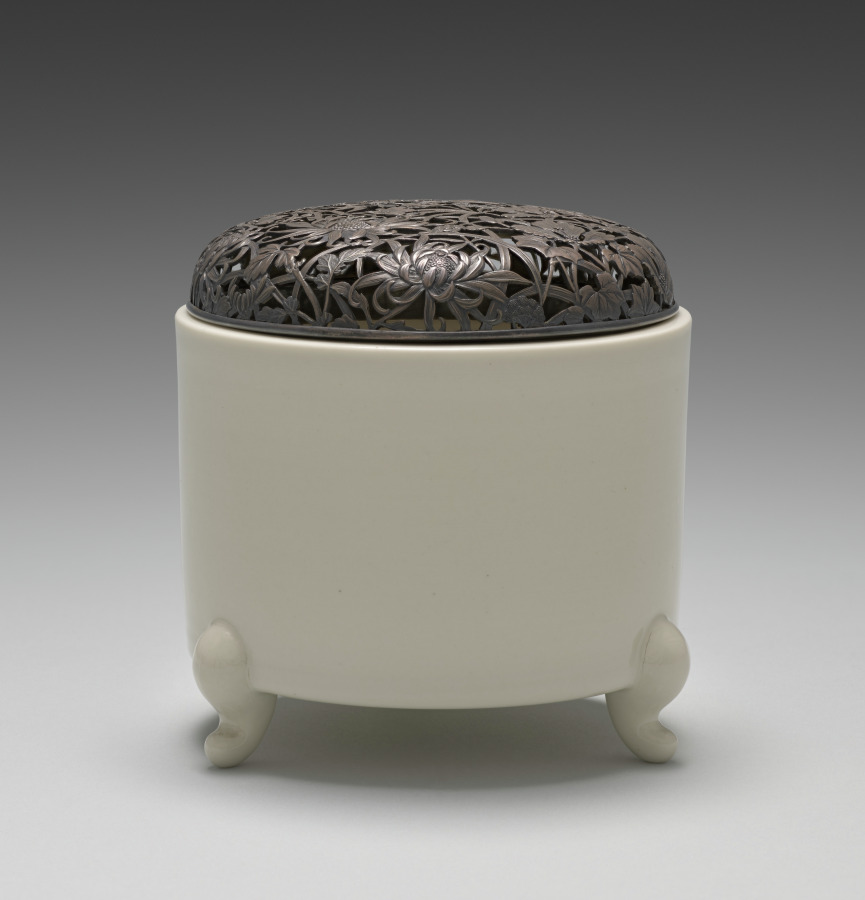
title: Incense Burner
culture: Japan, Meiji period (1868–1912)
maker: Seifū Yohei III (Japanese, 1851–1914)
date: 1893–1914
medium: Porcelain with creamy white glaze and molded design and floral openwork silver lid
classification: Ceramic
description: Yohei III made incense burners in a wide variety of designs and styles. The body and glaze of this one are taihakuji, or “great white porcelain,” an important early invention Yohei III devised in 1872. The burner has rounded, cabriole legs, resembling tiny table legs, attached to the exterior and the faintest decorative band around the bottom. Lids were produced outside the studio by metalwork specialists. For this incense burner, they created a floral-patterned silver lid.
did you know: This cylindrical incense burner has a distinctive translucent, creamy glaze over an ivory-colored clay body.